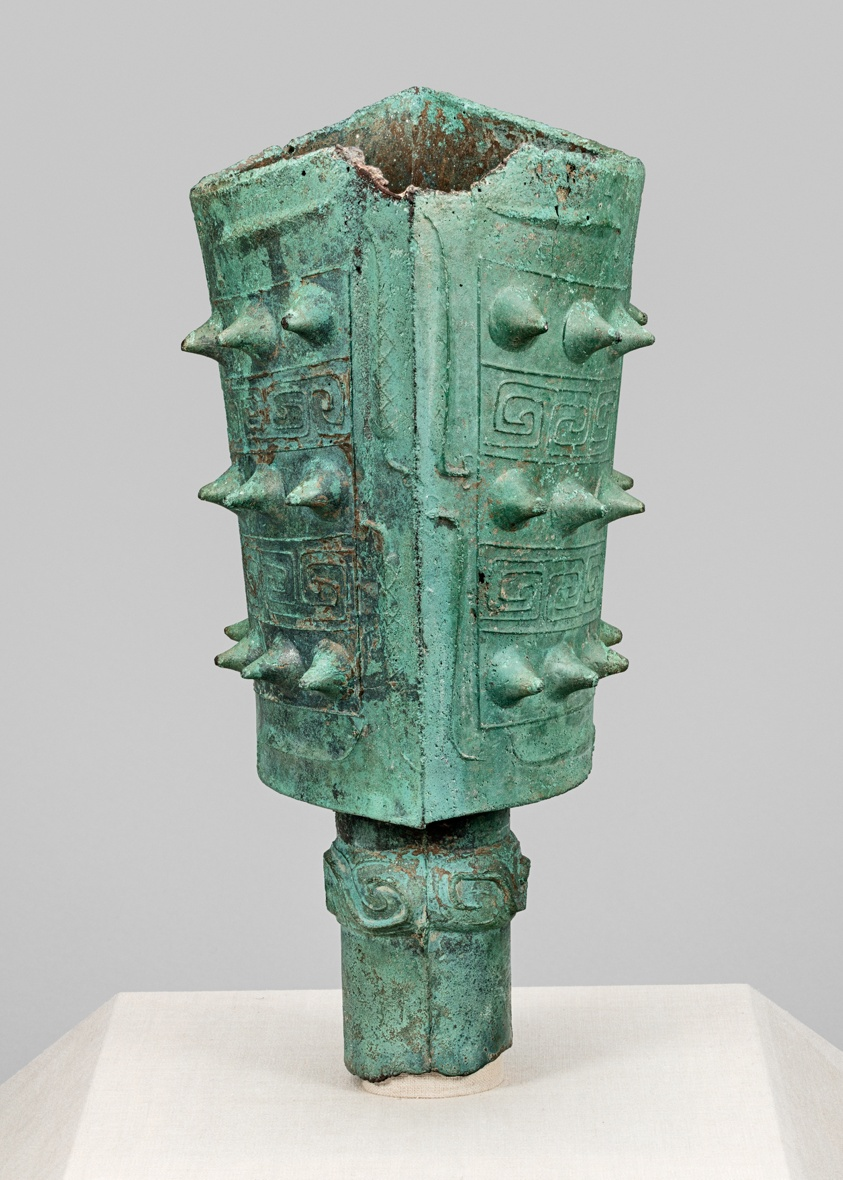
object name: Religious/Ritual Object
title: Bell (nao)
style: Chinese (culture or style)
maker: China, probably Hunan province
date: Western Zhou dynasty (1046–771 B.C.)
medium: Bronze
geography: China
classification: bronze; asian art; ritual objects